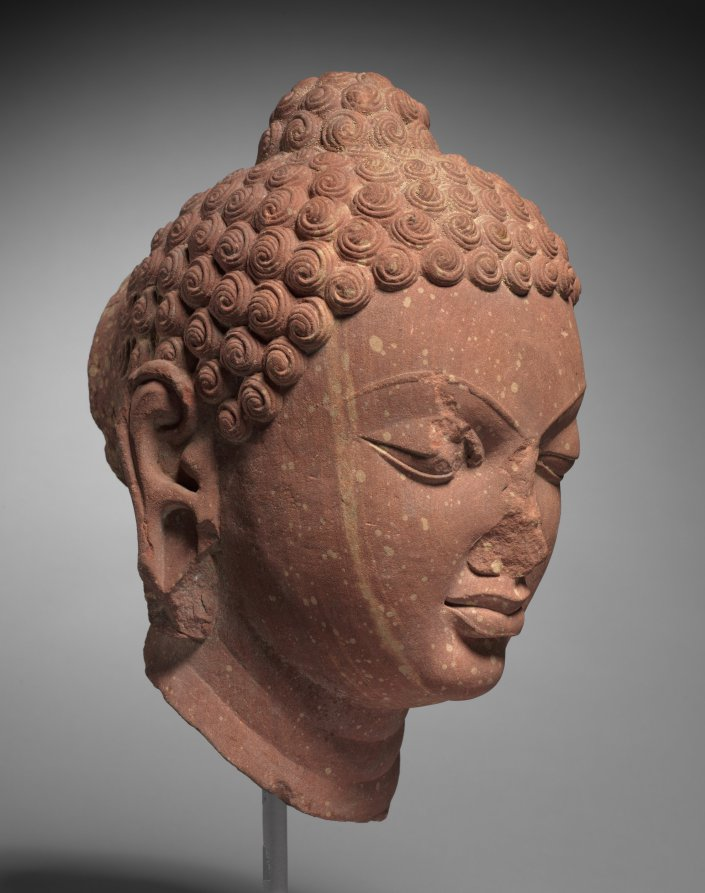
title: Head of Buddha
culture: Northern India, Uttar Pradesh, Mathura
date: 400s CE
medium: sandstone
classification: Sculpture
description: The brows arch with tension and alertness, though the lids are half closed. Short curls cover his head and cranial protuberance, which during this period came to be interpreted as a mark of one who has reached enlightenment, his state of awareness having surpassed the boundaries of an ordinary human being. Sculptors working during the time when kings of the Gupta dynasty (c. 319–550 CE) ruled northern India achieved a balance between fleshy volumes and idealized linear features. This balance led scholars to consider the Gupta period to be a “classical” age of Indian art.